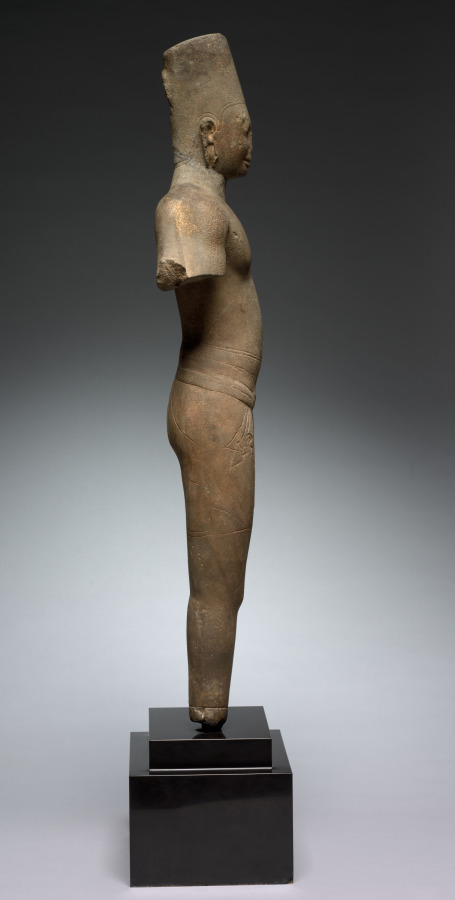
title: Vishnu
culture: Cambodia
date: 650–99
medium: gray sandstone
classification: Sculpture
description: The muscular physique, sensitive smile, and flat-topped high crown are characteristics of Vishnu images made during the pre-Angkorian period (c. 550–802) in Cambodia. This sculpture probably was the sole object of worship in a small brick temple sanctum.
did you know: The god wears a short garment (sampot) tied to form a loop on the left with the hanging ends on the right thigh.